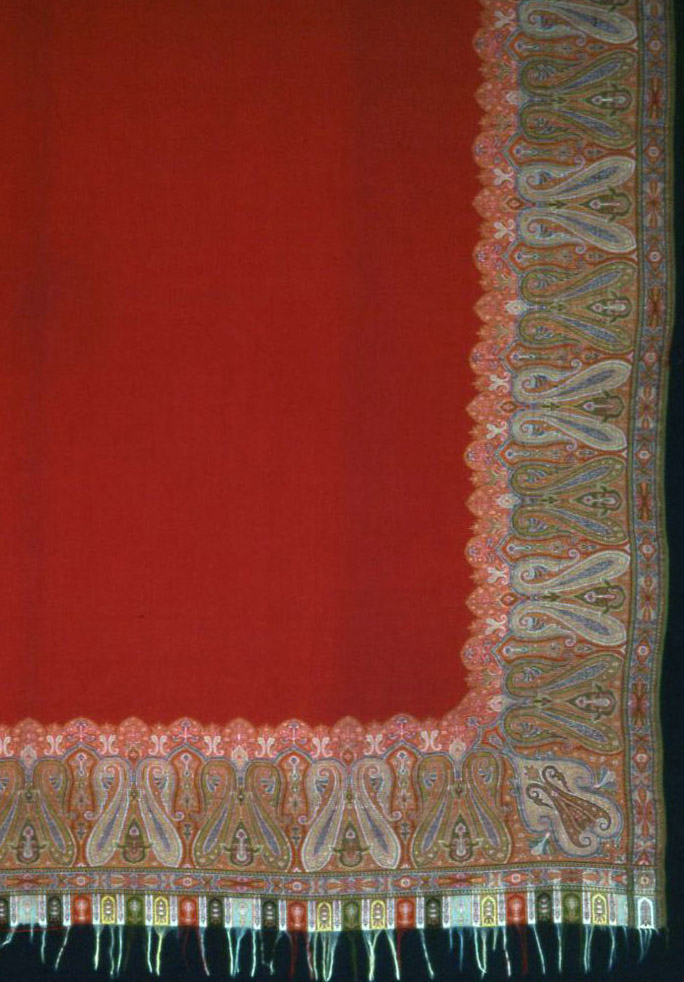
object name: Textile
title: Square Shawl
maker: France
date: 1850/75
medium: Silk and wool, warp threads dyed in multiple colors prior to weaving; center of weft-float faced 1:2 'Z' twill weave; patterned areas of two layers of complementary weft plain weave; main warp fringe; woven on loom with Jacquard attachment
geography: France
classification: textile; weaving